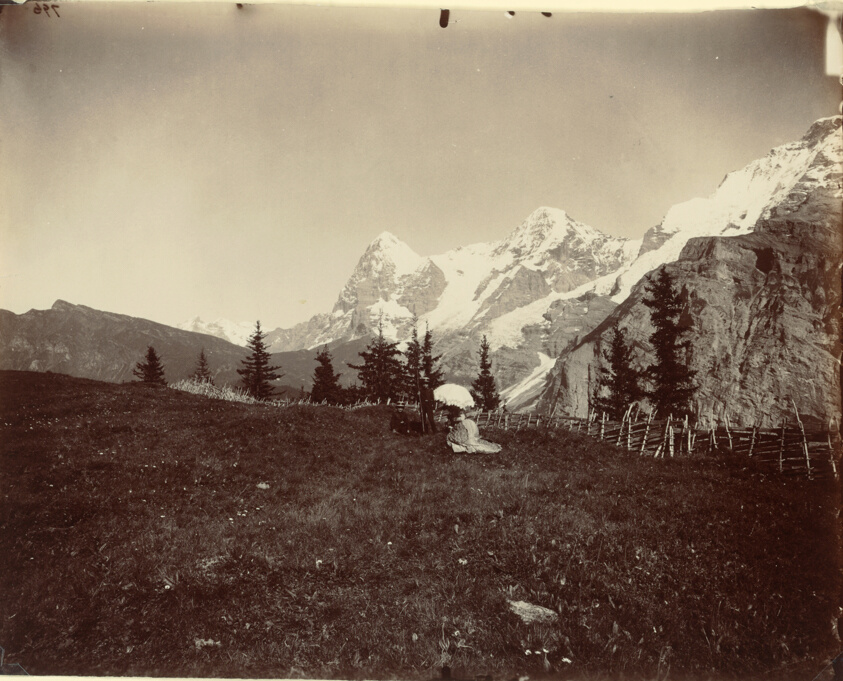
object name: Photograph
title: Landscape, Switzerland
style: 19th century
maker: Adolphe Braun (French, 1811–1877)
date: c. 1860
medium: Albumen print triptych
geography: France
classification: albumen silver print; photographic process; photography; photograph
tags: traditional landscapes, photography, landscapes